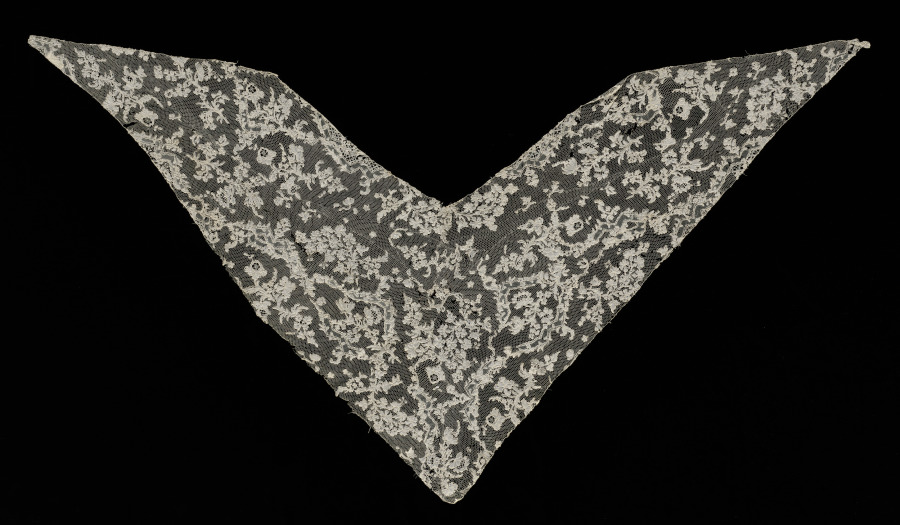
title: Lace Collar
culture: France, Argentan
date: 1700–1750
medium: Needle lace (Argentan)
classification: Lace